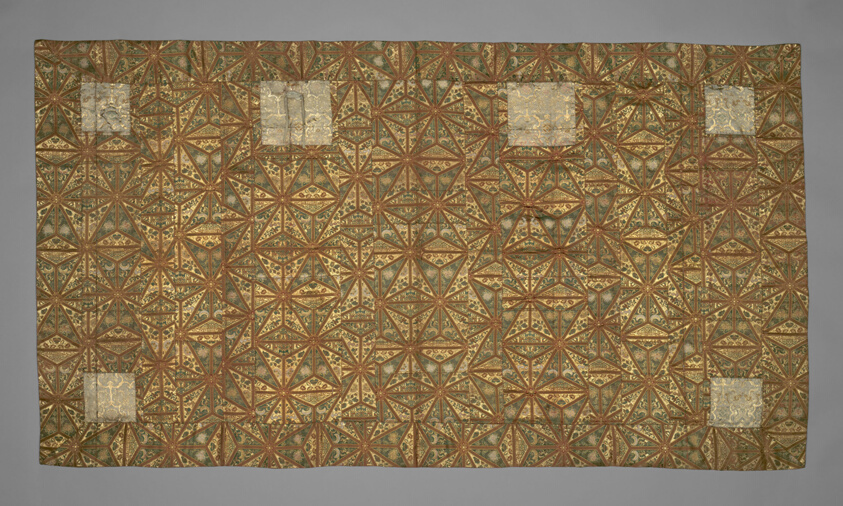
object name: Textile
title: Kesa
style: edo (japanese period)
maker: Japan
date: 18th century, Edo period (1603–1868)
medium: Silk and gilt-paper strip; satin weave with secondary binding warps and supplementary patterning wefts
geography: Japan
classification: textile; liturgical - buddhist; weaving